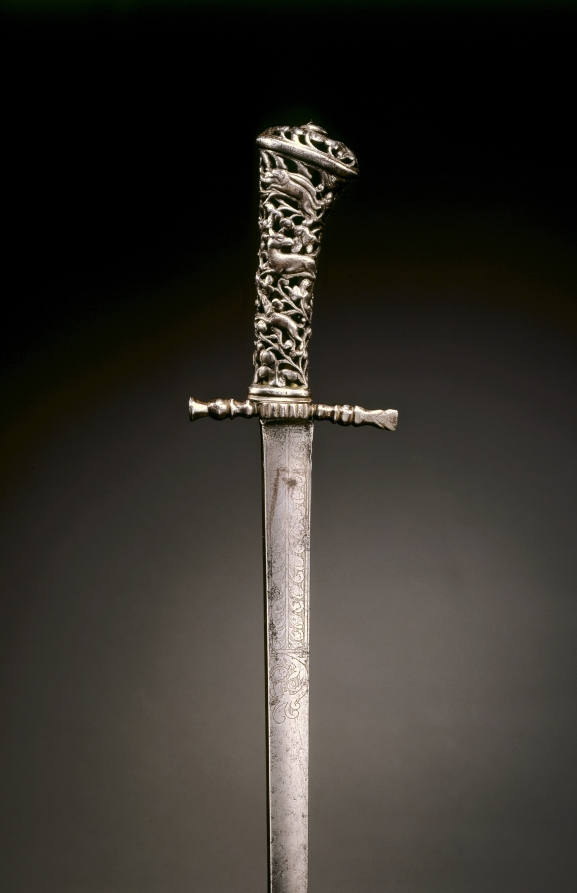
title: Hunting Sword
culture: Netherlands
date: c. 1760–70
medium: steel; pierced and chiseled cast-iron hilt ; blade engraved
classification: Arms and Armor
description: No gentleman's hunting costume was complete without a hunting sword. These special sidearms, designed primarily as defense against dangerous game in the field, were also used to dispatch game at the end of a chase. It was a point of honor among aristocratic hunters to carve and section the game in the field, a further function for which these swords were well suited. They were often made as a set, or garniture, and included smaller knives, forks, and other implements for carving the carcass.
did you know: Besides being viewed as a recreation for European nobility and an ancient and hereditary right, hunting was recognized as a necessary and pragmatic skill which supplied an additional source of food and dispatched animals which were considered a menace.